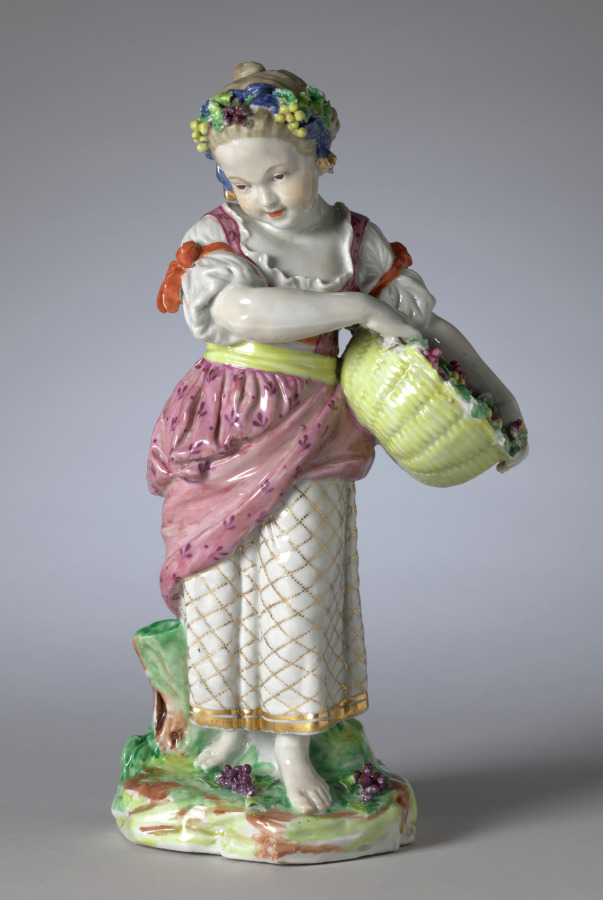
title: Figure of Autumn from the Four Seasons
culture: England, Bristol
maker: Bristol Porcelain Factory (British, 1770–81)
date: c. 1775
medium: hard-paste porcelain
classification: Ceramic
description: The modern notion of childhood as a time of innocence and simplicity emerged during the second half of the eighteenth century. This understanding of adolescence led to numerous depictions of children as personifications of the four seasons. Here autumn is portrayed as a young girl playfully jostling her overskirt as she balances a basket of fruit against her hip. The grapes, plums, and apples filling her basket allude to a plentiful fall harvest.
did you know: Allegorical figures most often decorated a table during the dessert course, providing amusing subjects for conversation.